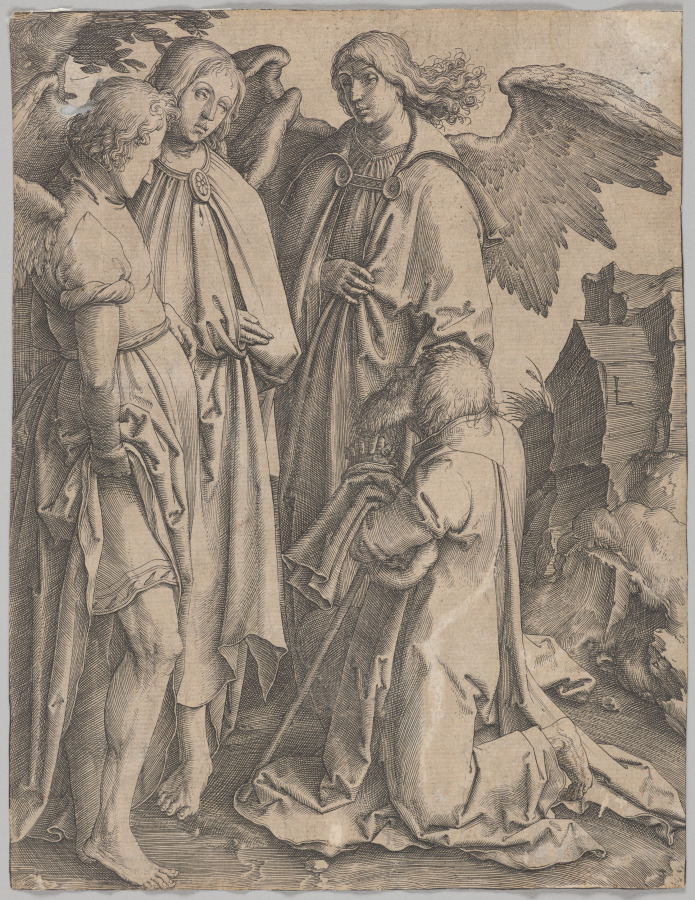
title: Abraham and the Angels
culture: Netherlands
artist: Lucas van Leyden (Netherlandish, 1494–about 1533)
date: 1513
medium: engraving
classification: Print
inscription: Engraving depicting Abraham and the Three Angels; Abraham, in profile facing to the left, kneels before three angels in front of him at left. Lettered with the letter “L” on rock formations behind Abraham to the right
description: Lucas van Leyden’s subject derives from Genesis 18, when Abraham met three angelic figures as they walked across the plains of Mamre. Abraham invited them to rest under a tree, seen in the left background, where he would later receive news from the Lord that his wife Sarah would bear a son. Van Leyden depicted Abraham kneeling before three standing figures and placed a walking stick in the hand of one of the angels to identify them as travelers. The compact composition and delicate textures, such as the angels’ wings, are typical of the artist's engraving technique.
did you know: Lucas van Leyden was an innovator in the medium of engraving, inventing new strategies for modeling shadow by cutting curved parallel lines and then adding shorter lines in between, as seen on the angel’s knee.